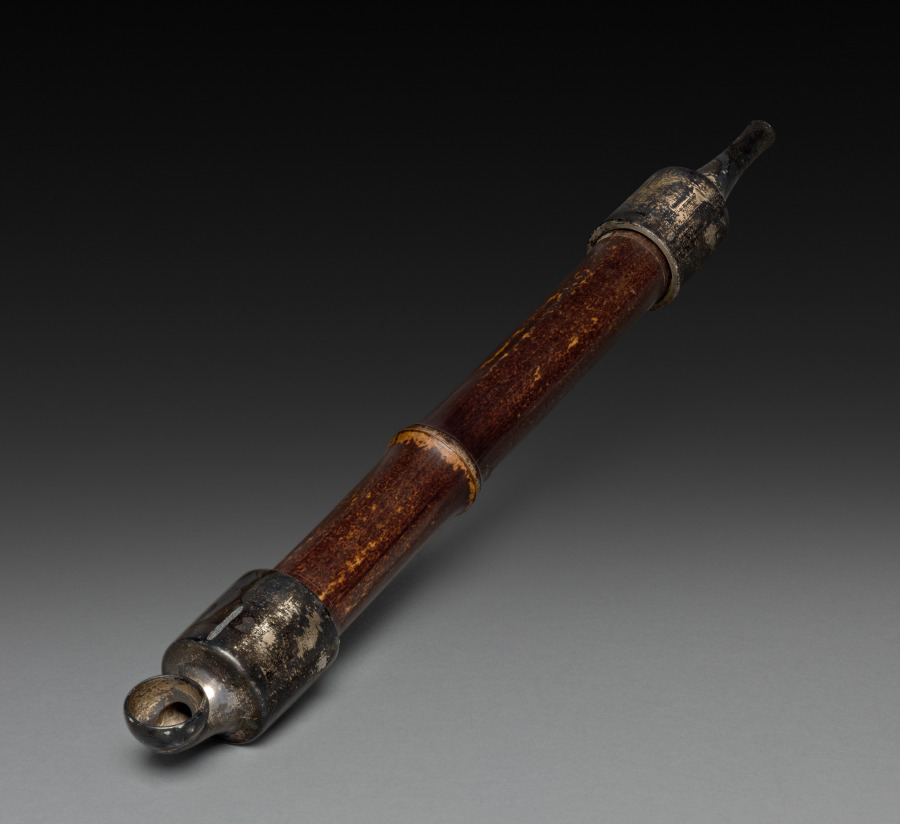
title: Tobacco Pipe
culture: Japan, Edo period (1615–1868)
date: 1700s–mid-1800s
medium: bamboo and silver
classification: Miscellaneous